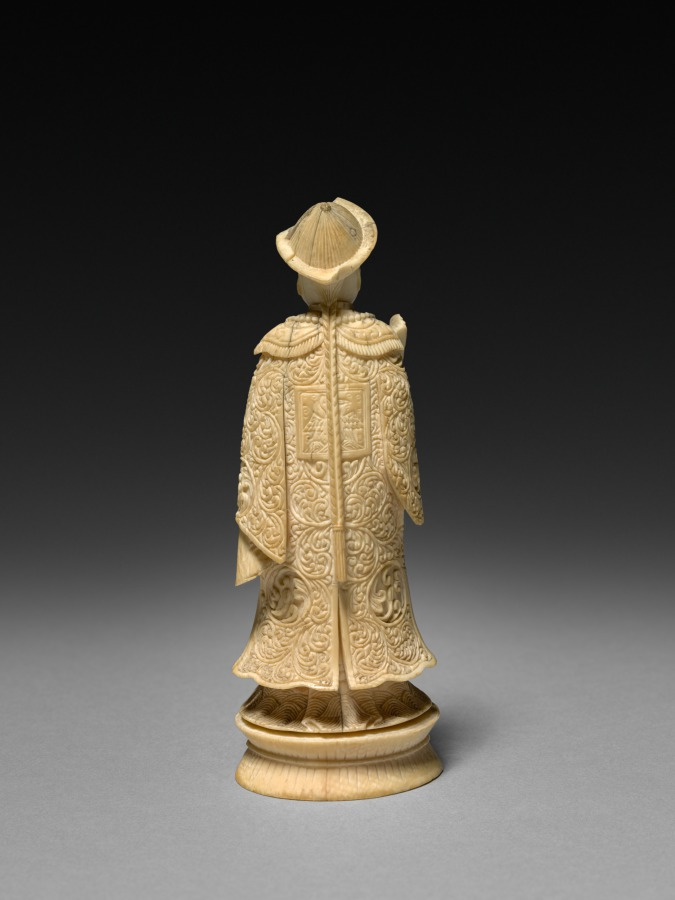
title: Chess Piece: King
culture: Japan, Meiji period (1868–1912)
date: early 1900s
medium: ivory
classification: Ivory